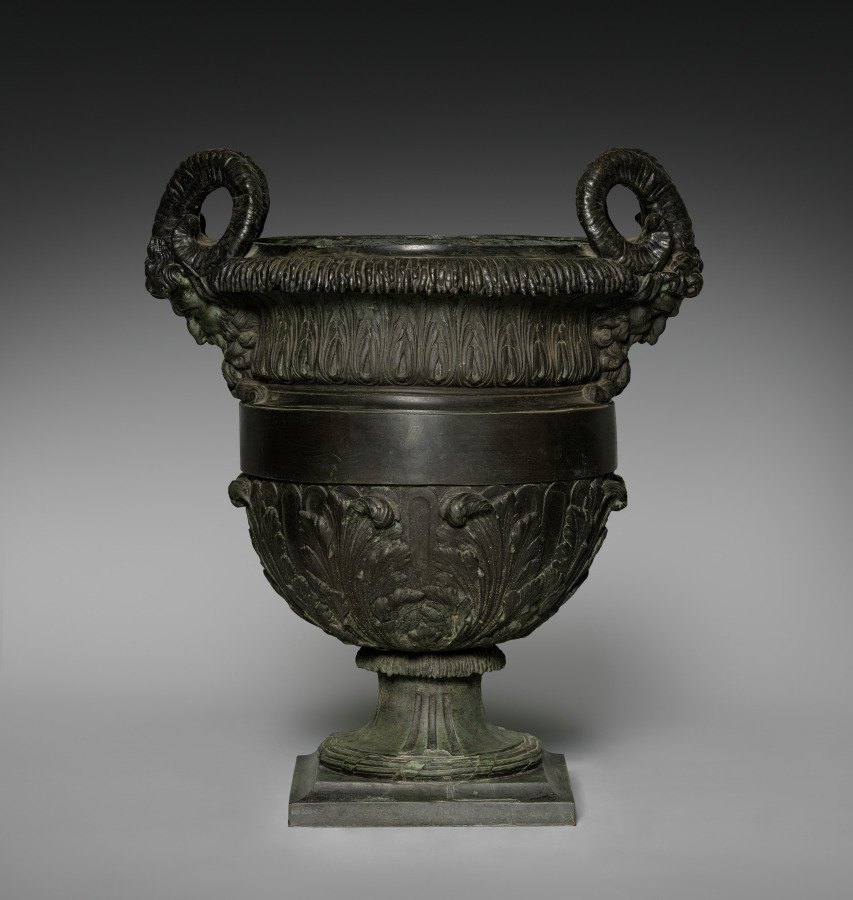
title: Urn with Satyr Heads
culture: France, 18th century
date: 1700s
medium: bronze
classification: Metalwork